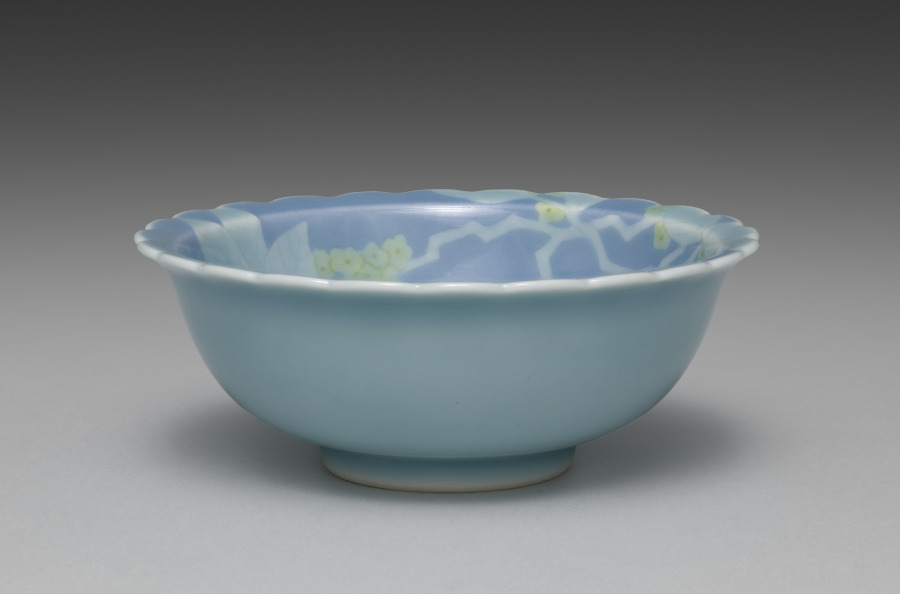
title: Dish from Dishes with Flowers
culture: Japan, Taishō period (1912–26) or Shōwa period (1926–89)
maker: Seifū Yohei IV (Japanese, 1872–1951)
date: 1914–46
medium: One from a set of five dishes; porcelain with underglaze yellow and blue glaze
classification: Ceramic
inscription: 清風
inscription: 清風造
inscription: 成山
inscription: 清風盧人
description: One can imagine a cool summer breeze when looking at this set of dishes, each shaped with a crenulated mouth and glazed with blue. Around the rim and into the basin, the bowls have low-relief designs of flowers with underglaze yellow petals; their leaves and stems show white through the glaze. On each dish, the design continues over the rim onto one side.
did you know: Seifū Yohei IV’s dishes with flowers feature underglaze yellow.